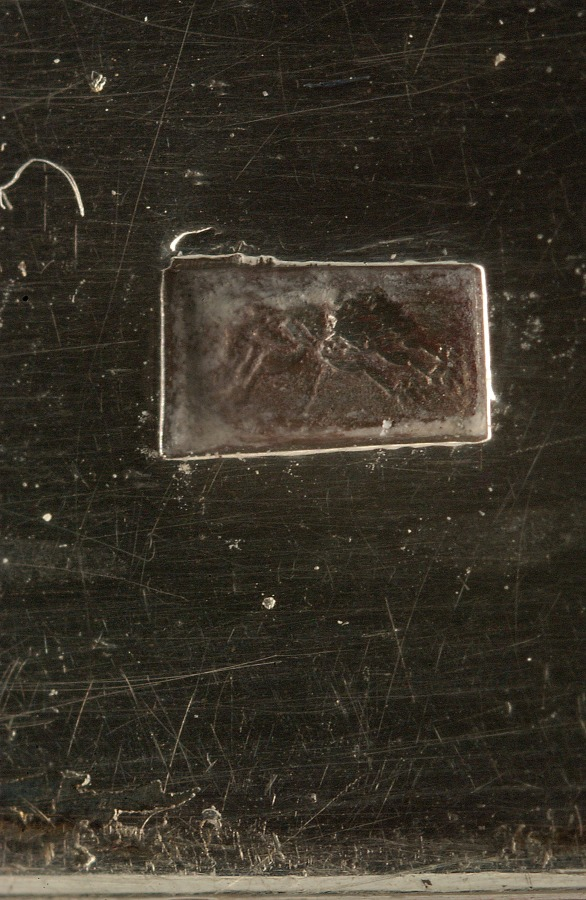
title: Covered Tureen on Stand (Pot à oille)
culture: France, late 18th-early 19th Century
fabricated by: Henry Auguste (French, 1759–1816)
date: 1797–98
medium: silver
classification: Silver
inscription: [Coat-of-arms of Amoral don Federico Carlos Gravina on bowl; cover; stand]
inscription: [Assay mark for large-sized work, 1798-1809, lining exterior; tureen foot exterior]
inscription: [Assay mark for medium-sized work, 1798-1809, beneath stand foot; on edge of cover]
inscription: [Maker's mark of Henri Auguste, master silversmith in 1785, beneath tureen foot; beneath stand foot; inside stand foot edge]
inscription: [Official assay mark for first standard silver, Paris, 1798-1809, beneath stand foot; lining exterior; on cover]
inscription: [Official mark for silver imported from countries with customs conventions, 1838-1912, beneath stand foot; edge of cover; tureen lip exterior; lining exterior; on one tureen handle; outside stand foot; tureen foot exterior]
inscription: [Unknown mark, possibly Ceres' profile in square with "E" and "7", beneath stand foot; on cover; rim of lining; tureen foot exterior; tureen lip exterior]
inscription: [Unofficial assay mark for first standard silver, Paris, 1794-1797, beneath foot stand; beneath tureen foot; near tureen handle exterior]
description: This pot-à-oille was designed by master goldsmith Henri Auguste after drawings by draftsman and sculptor Jean Guillaume Moitte. Though many of the neoclassical decorative elements on this piece are pulled from Moitte’s design, Auguste’s final product leaves out much of the proposed ornamentation. Instead this object finds distinction in its large size and smooth expanses of silver that emphasize the purity of its lines.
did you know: The coat of arms on the body of the work corresponds to the family of Federico Carlos Gravina, a Sicilian-Spanish admiral who was known to have had a close diplomatic relationship with Napoleon I.